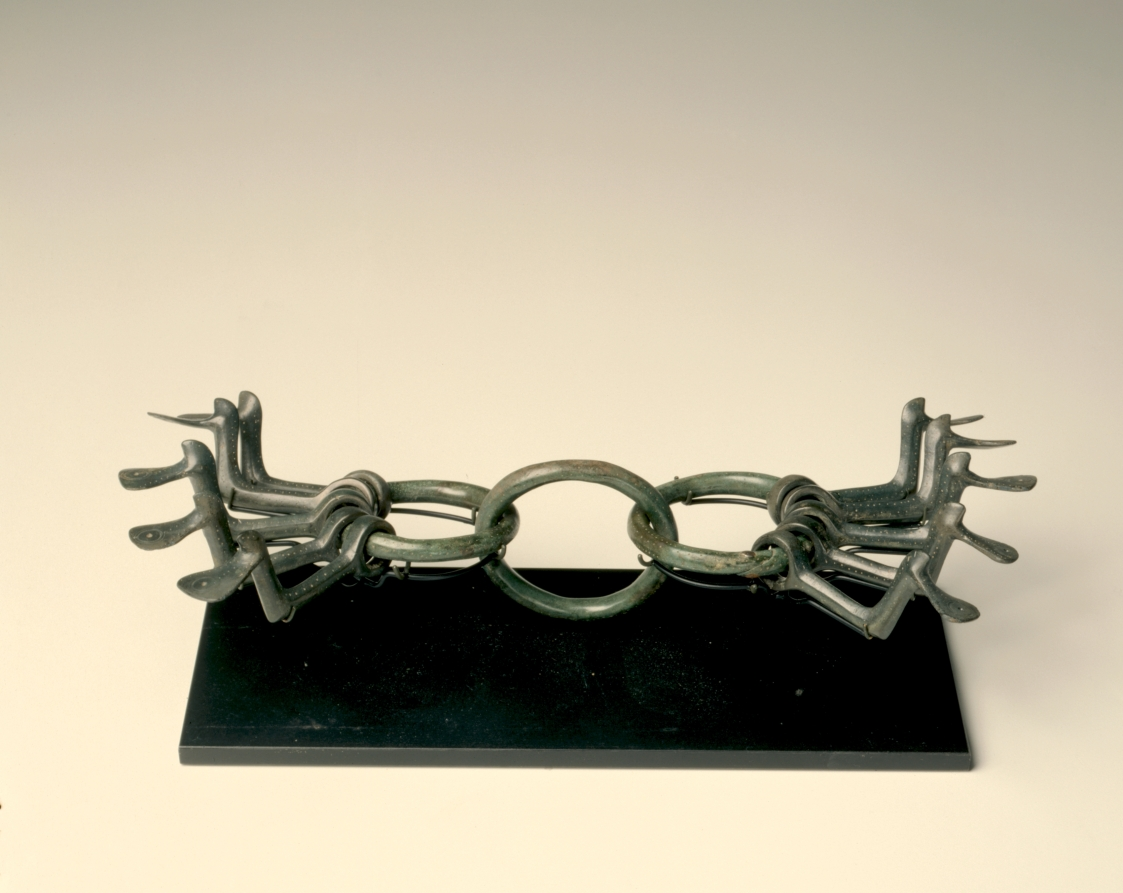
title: Cauldron Ornament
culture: Central Europe, Bronze Age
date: c. 1200 BCE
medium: bronze with iron rivets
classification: Metalwork